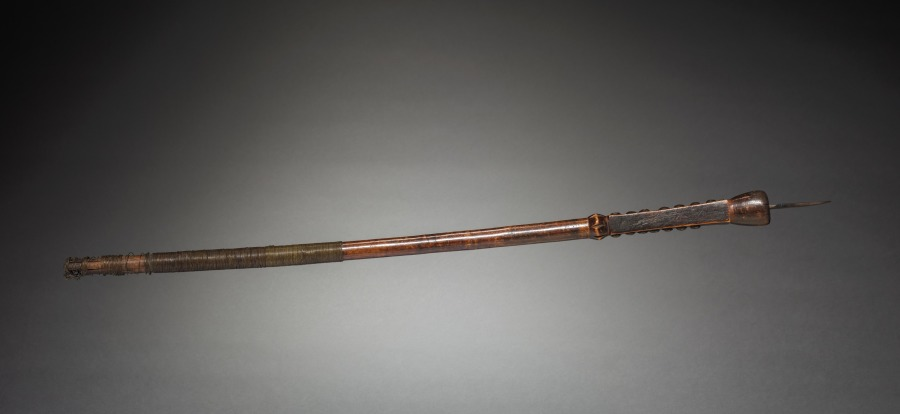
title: Elephant Prod (?)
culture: Africa, Central Africa, Angola, unknown maker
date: early 1900s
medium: Wood, wire, upholstery studs, and metal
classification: Arms and Armor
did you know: In the early twentieth century, museums often collected objects from Africa for their ethnographic––not artistic––value, which is why this tool is in the CMA's collection.